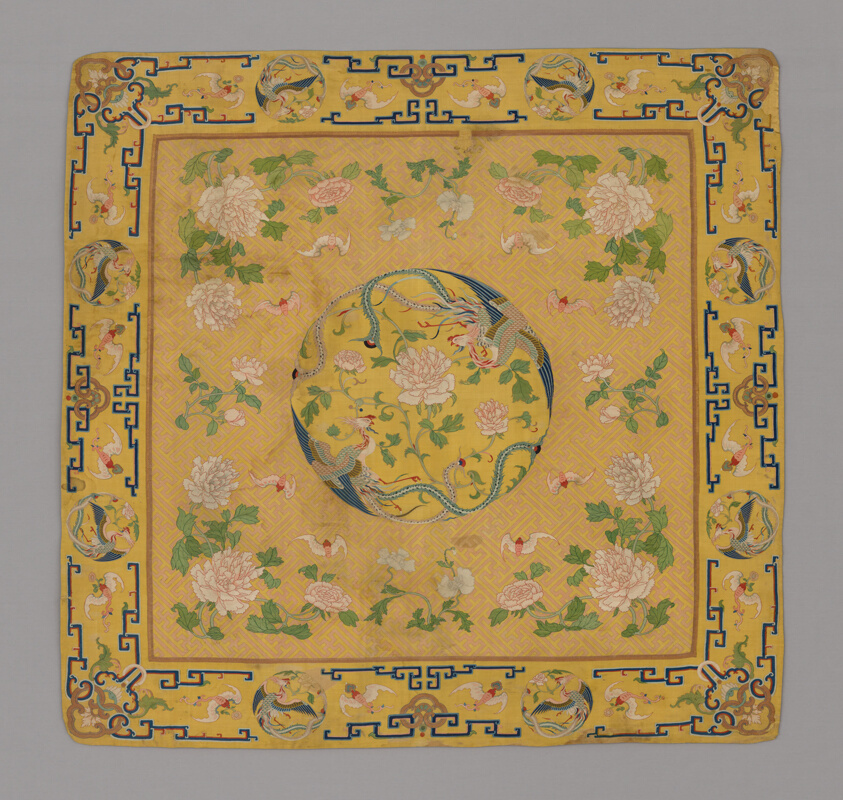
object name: Textile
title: Cushion Cover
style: qing, Chinese (culture or style), East Asian, asian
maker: Manchu (China)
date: Qing dynasty (1644–1911), 1700/50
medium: Silk and gold-leaf-over-lacquered-paper-strip-wrapped silk, slit and dovetailed tapestry weave with interlaced outlining wefts; painted details; lined with silk, warp-float faced 7:1 satin weave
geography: China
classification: textile; weaving